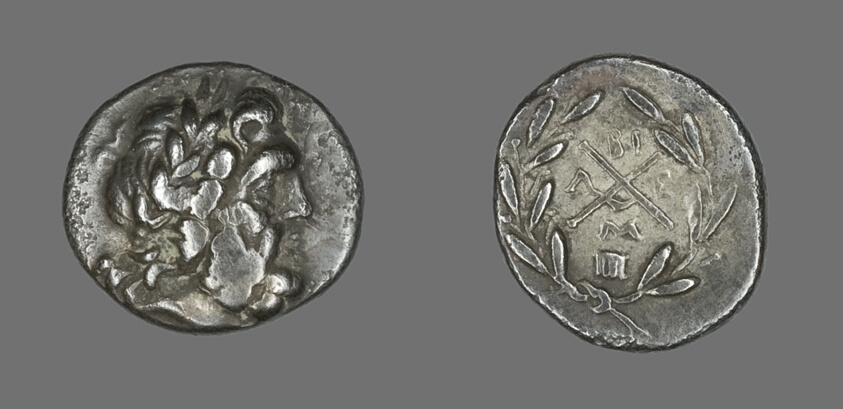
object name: Coin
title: Hemidrachm (Coin) Depicting the God Zeus Amarios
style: greek, ancient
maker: Greek, minted in Megalopolis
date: 234-146 BCE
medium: Silver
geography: Megalópolis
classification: coin; ancient art